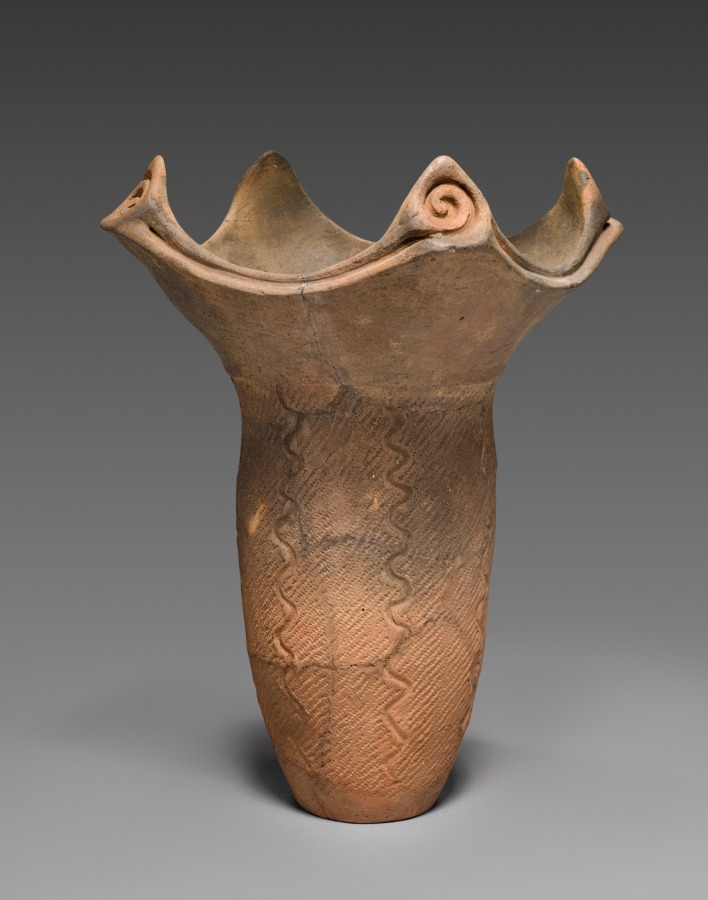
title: Deep Vessel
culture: Japan, Jōmon period (c. 10,500–300 BCE)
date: c. 2500 BCE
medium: Earthenware with impressed and carved decoration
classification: Ceramic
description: This cooking vessel was formed by piling coils of clay atop one another, smoothing and thinning the walls, and then adding surface decoration. Vertical incised squiggle lines as well as diagonal impressed cord patterns create texture. The mouth rises in four dramatic triangular forms, each with a coiled design inside.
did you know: Jōmon, impressed rope patterns, are typical of vessels of this era, so archaeologists named the period after them.